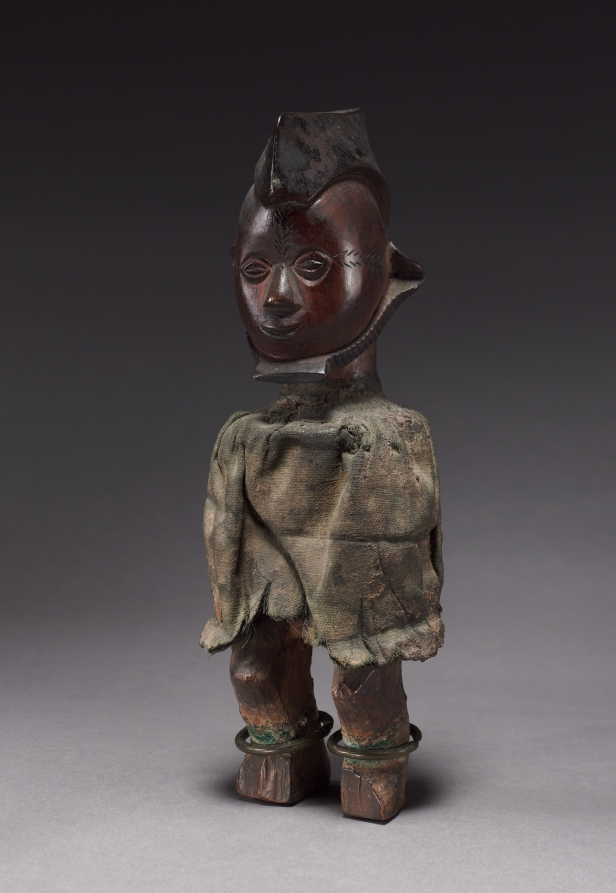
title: Male Figure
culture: Africa, Central Africa, Republic of the Congo or Democratic Republic of the Congo, Teke-style maker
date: late 1800s-early 1900s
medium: Wood, cloth, organic material, and copper alloy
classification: Sculpture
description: This figure was the Delennes' first African art acquisition. They purchased the work in Paris in 1958—the year they were married—from the then leading French dealer Henri Kamer. The couple's interest in African art, which also inspired this particular acquisition, was triggered by their visit to the Congolese pavilion at the Brussels world's fair that same year. This experience made a lasting impression and triggered a lifelong appreciation for the art of what was then still the Belgian Congo. Although Odette later admitted that she knew that this figure was not the best example of Teke art, she and her husband held on to it because it served as a personal souvenir of their meeting each other.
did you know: This figure was the Delennes' first African art acquisition; it symbolized Rene and Odette’s first meeting.